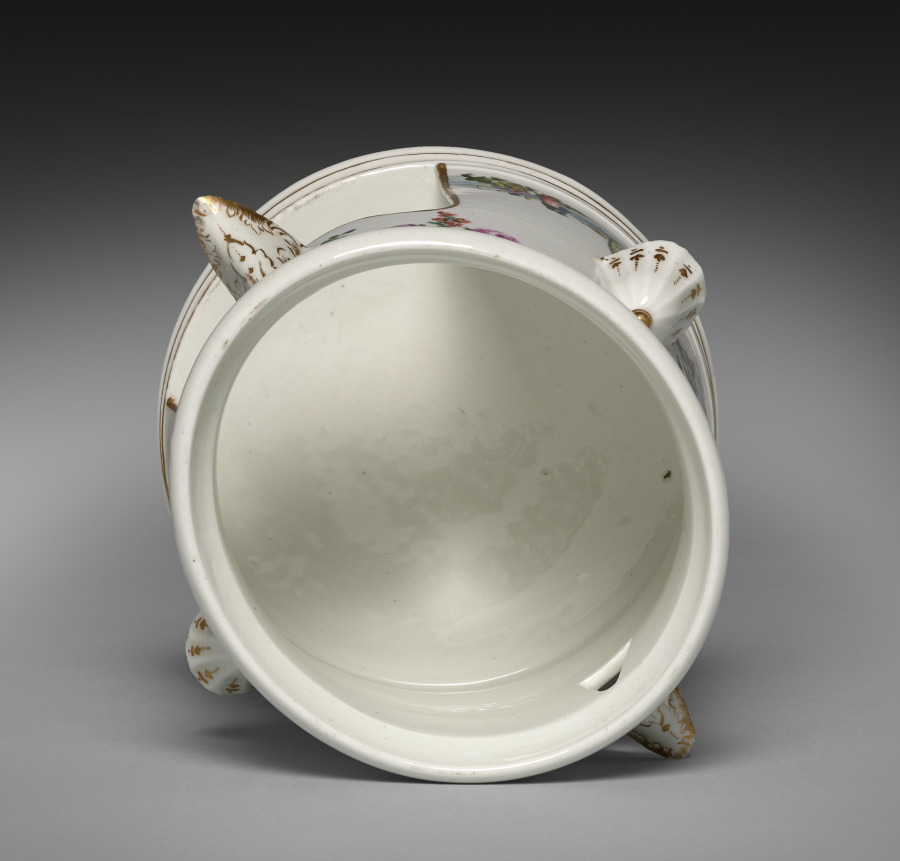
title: Food Warmer (Veilleuse)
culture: Germany, Nymphenburg, 18th century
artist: Nymphenburg Porcelain Factory (German, founded 1747)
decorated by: probably by Georg Christoph Lindemann (German)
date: c. 1758–1760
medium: porcelain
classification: Ceramic